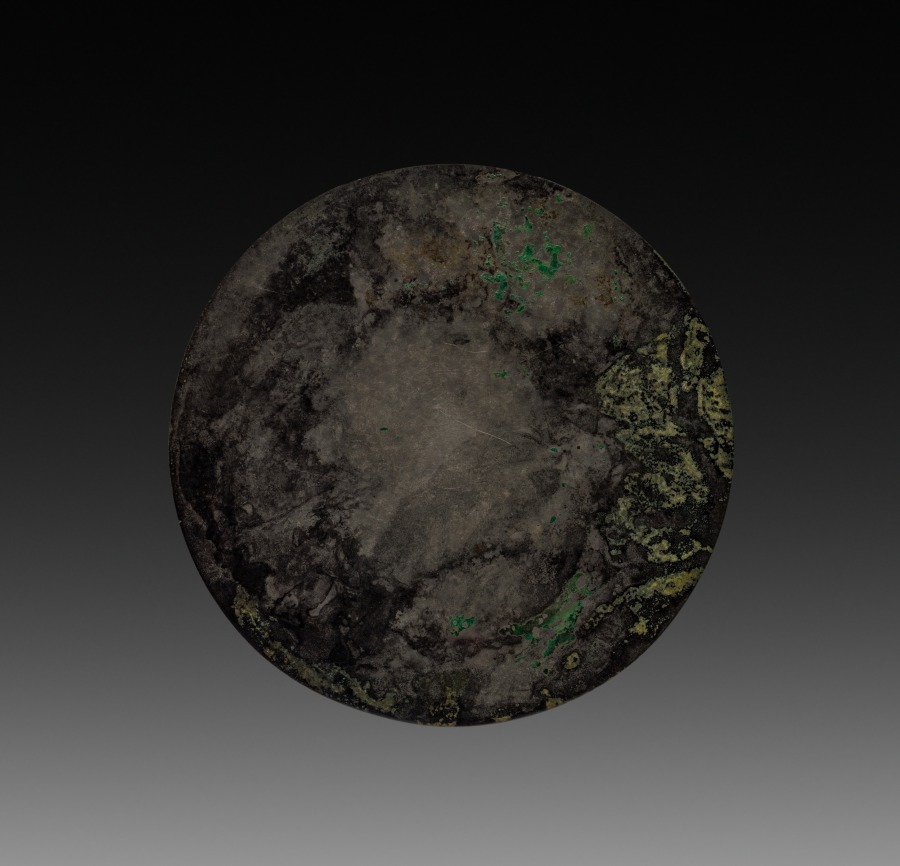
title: TLV Mirror with Multiple Nipples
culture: China, Eastern Han dynasty (25–220 CE)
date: 1–200 CE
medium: bronze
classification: Metalwork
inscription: (after Karlgren, "Early Chinese Mirror Inscriptions," Bulletin of the Museum of Far Eastern Antiquities No. 6 [1934], no. 215): The Shang-fang has made the mirror, it is truly very good; on it are Immortals who do not know aging; when thirsty they drink from the jade springs; when hungry they eat dates; they roam about in the whole world and ramble [everywhere between] the four seas; may your longevity be like [that of] metal and stone; may you be a protector of the country.